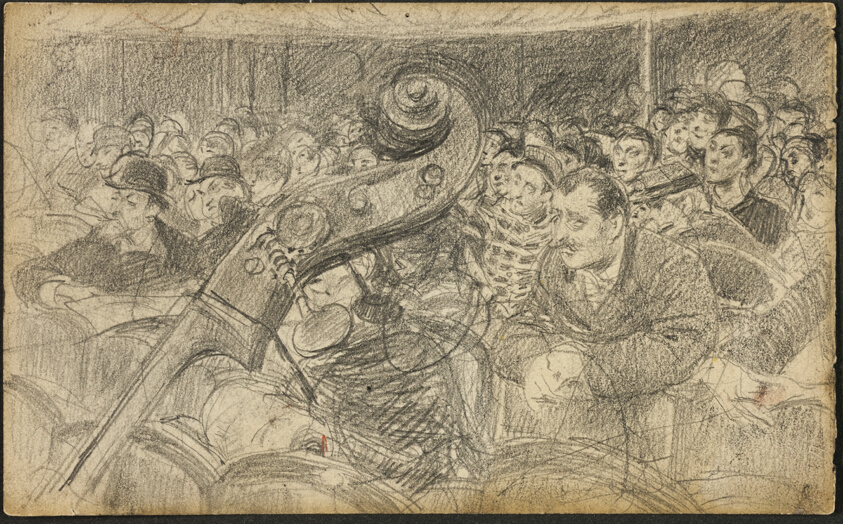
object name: Drawing and Watercolor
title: Audience at a Parisian Theatre II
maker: Giovanni Boldini (Italian, 1842-1931)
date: c. 1885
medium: Graphite on cream wove paper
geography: Italy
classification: graphite; prints and drawing; paper